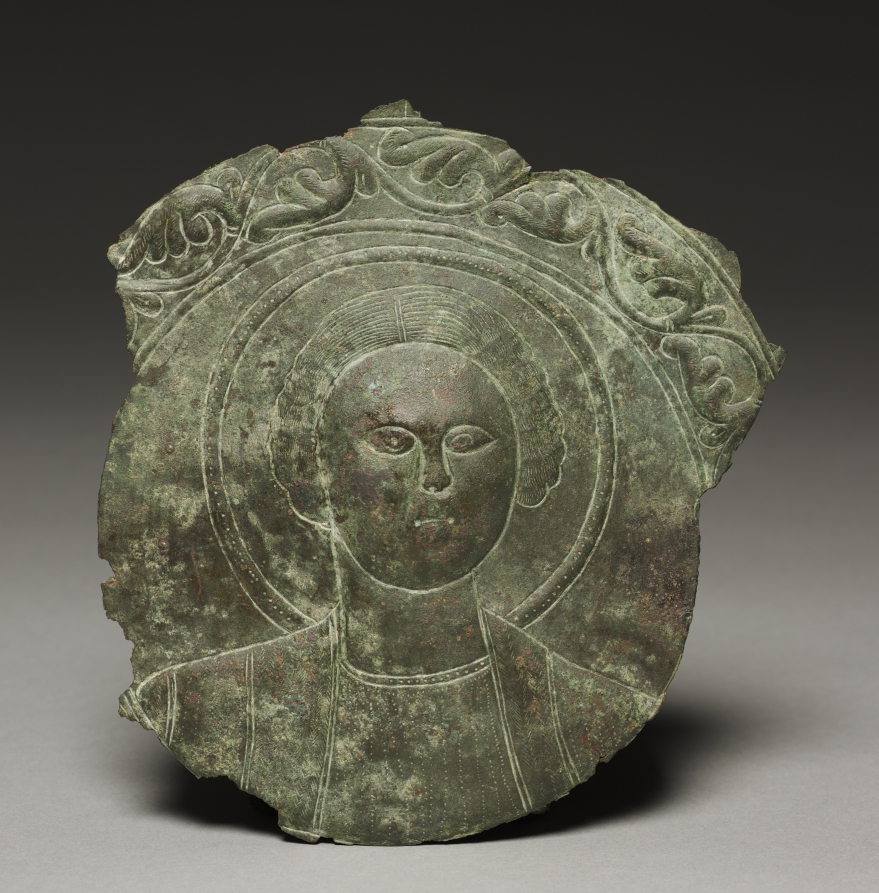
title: Door Plaque with the Head of a Saint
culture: Byzantium, Syria(?), Byzantine period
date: 500s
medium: bronze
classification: Metalwork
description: The original function of this bronze plaque is not known with certainty. It was probably once gilded and may have been affixed to a wooden.